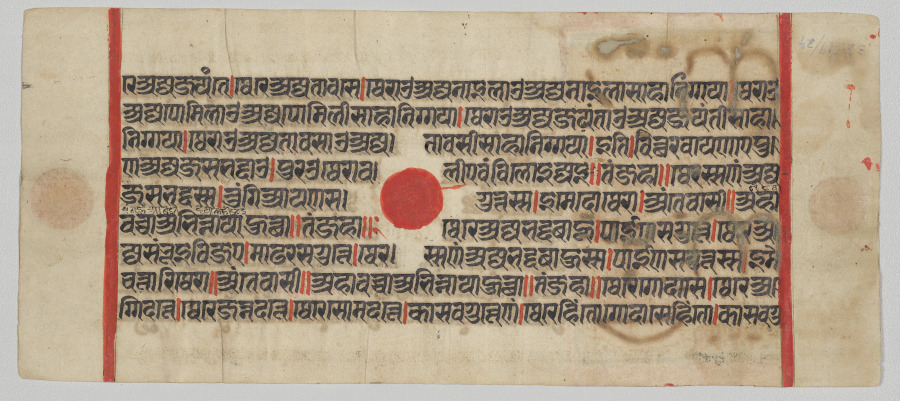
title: Text, folio 60 (recto), from a Kalpa-sutra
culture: Western India, Gujarat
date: c. 1450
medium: Gum tempera, ink, and gold on paper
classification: Painting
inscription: [[beginning with line 1]] [the]re ajja-Jayaṁte | there ajja-Tāvase | therāo ajja-Nāïlāo Ajjanāilā sāhā niggayā | therāo [line 2] ajja-Pomilāo Ajjapomilī sāhā niggayā | therāo ajja-Jayaṁtāo Ajjajayaṁtī sāhā| [line 3] niggayā | therāo ajja-Tāvasāo Ajja|tāvasī sāhā niggayā | iti | vitthara-vāyaṇāe pu| [line 4] ṇa ajja-Jasabhaddāo | purao therāva|lī evaṁ viloijjaï || taṁ jahā || therassa ṇaṁ ajja- [line 5] Jasabhaddassa | tuṁgiāyaṇa-sa|guttassa | ime do therā | aṁtevāsī || ahā- [line 6] vaccā abhinnāyā hutthā ||: there ajja-Bhaddabāhū | pāīṇa-sagutte | there a| [line 7] jja-Saṁbhūivijae | māḍhara-sagutte | thera|ssa ṇaṁ ajja-Bhaddabāhussa | pāīṇa-saguttassa | ime [line 8] cattāri therā || aṁtevāsī || ahāvaccā abhinnāyā hutthā || taṁ jahā || there Godāse | there A| [line 9] ggidatte | there Jannadatte | there Somadatte | kāsava-gutte ṇaṁ | therehiṁto Godāsehiṁto | kāsava-gu-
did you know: The three red dots in the margins and the center occur only on the reverse side of the page; the obverse side has only one red dot in the center.